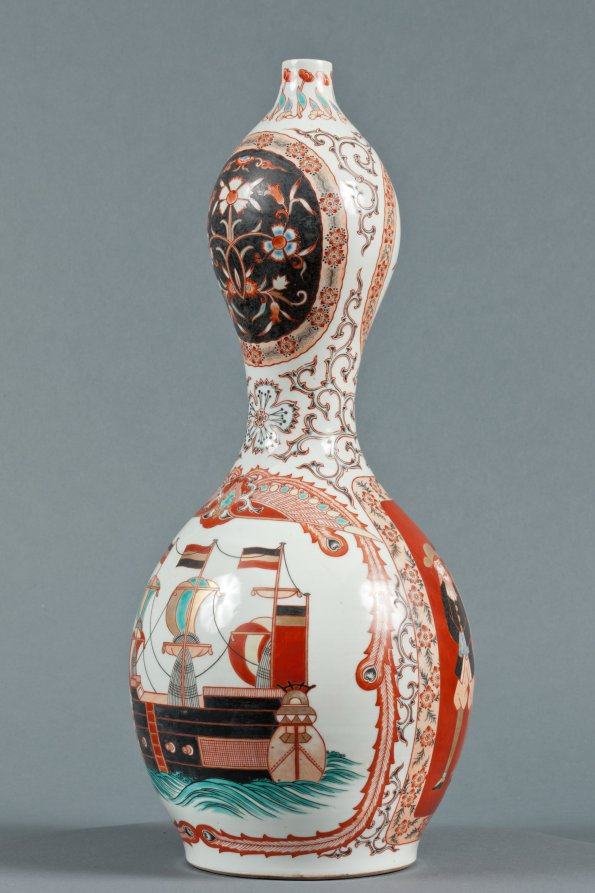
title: Bottle with Western Ships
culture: Japan, Edo period (1615–1868)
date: c. 1800–1868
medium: Porcelain with decoration in colored enamels and underglaze blue, overglaze enamels, and gold (Hizen ware, Arita type)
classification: Ceramic